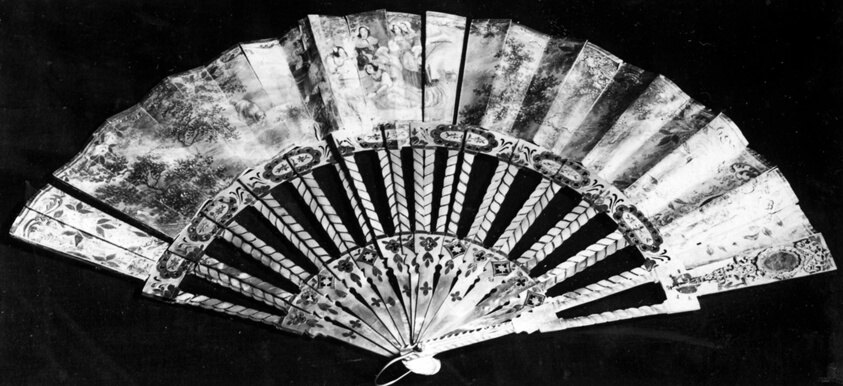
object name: Costume and Accessories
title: Fan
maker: Italy or Spain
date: 19th century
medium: Carved and gilded mother-of-pearl sticks and guards; painted paper mount; rhinestone rivet; metal loops; gilt ornament on guard with mirror; gilt ornament on guard with stone missing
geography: Italy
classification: textile; fan - paper; costume accessory - folding fan; costume